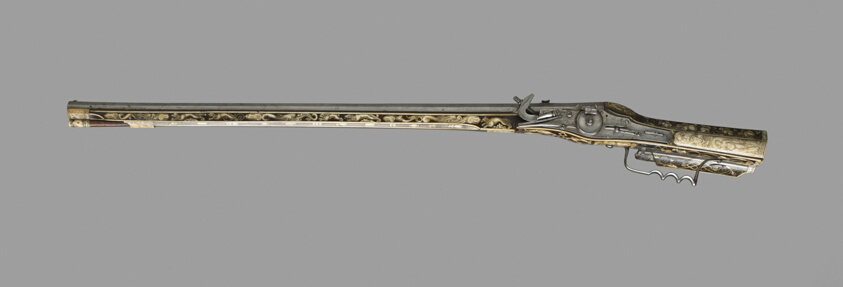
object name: Arms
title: Wheellock Rifle of Archduke Charles of Styria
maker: Hans Paumgartner (Austrian, Graz, active 1556-1582)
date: 1571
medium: Steel, fruitwood, and staghorn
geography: Graz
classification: firearm-long gun; arms; arms and armor